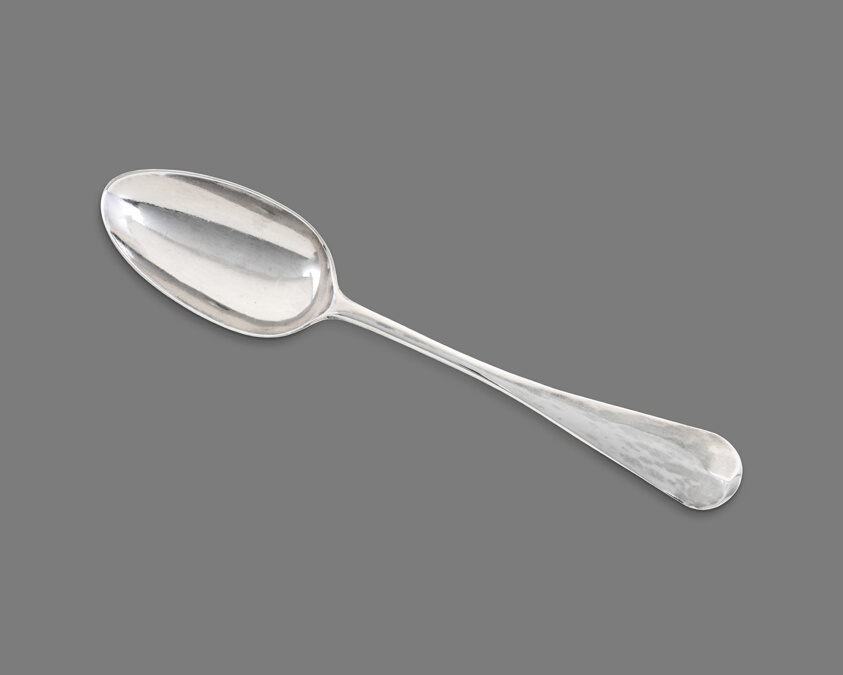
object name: Metalwork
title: Spoon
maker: Benjamin Bunker; American, 1751–1842; Nantucket, Massachusetts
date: 1800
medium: Silver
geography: Nantucket Island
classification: spoon; silver; utensil; american decorative arts; american arts; decorative arts